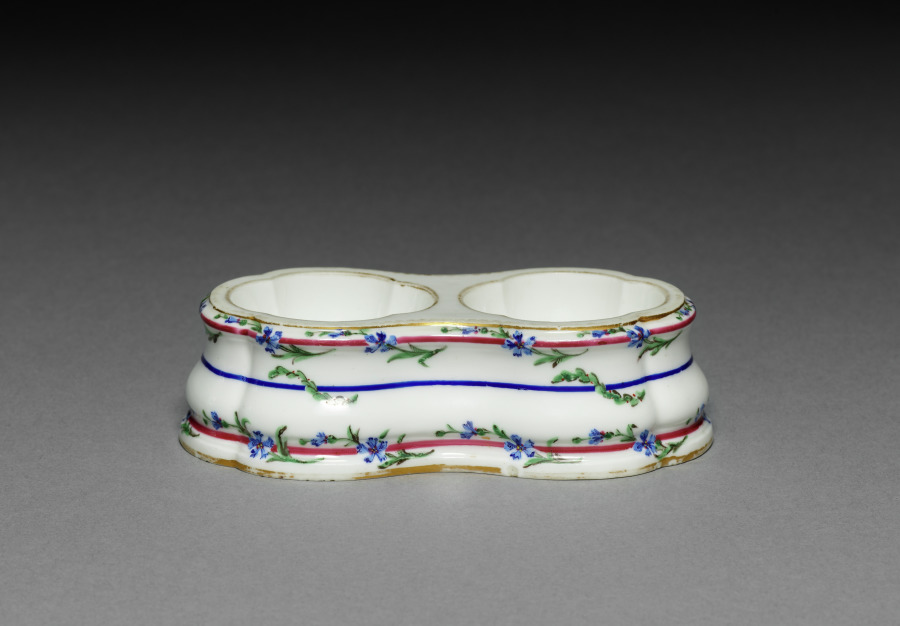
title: Double Salt Dish (Salière)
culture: France, Sèvres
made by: Sèvres Porcelain Factory (French, est. 1756)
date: 1790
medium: Hard-paste porcelain with enamel and gilt decoration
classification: Ceramic